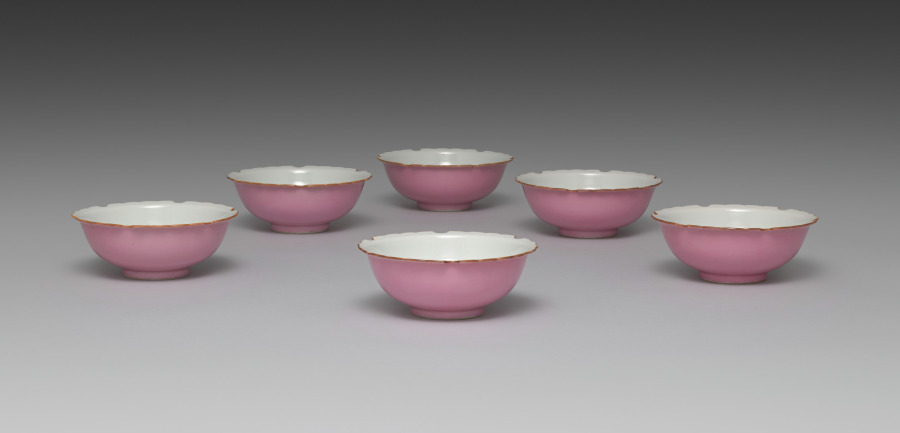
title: Snow-Flake Side Dishes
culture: Japan, Meiji period (1868–1912)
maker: Seifū Yohei III (Japanese, 1851–1914)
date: 1893–1914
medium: Set of six dishes; porcelain with lobed rims and pink glaze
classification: Ceramic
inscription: 清風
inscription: 帝室技芸員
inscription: 清風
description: According to the box lid, this set of 6 side dishes, or mukōzuke, are “snow-flower style” (sekkashiki), having mouths shaped like snowflakes. Their mouths, which have 6 lobes and scalloped edges, are traced with brown iron oxide at the rim. The outside of each bowl is glazed with a very bright pink over the basin and foot, and the inside is left white. From directly above, one sees a snowflake-like shape, and from the side, they seem to float above a rosy ground.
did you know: The box for this set of dishes has an inscription on the side noting that they were for a person with the family name Nakamoto.